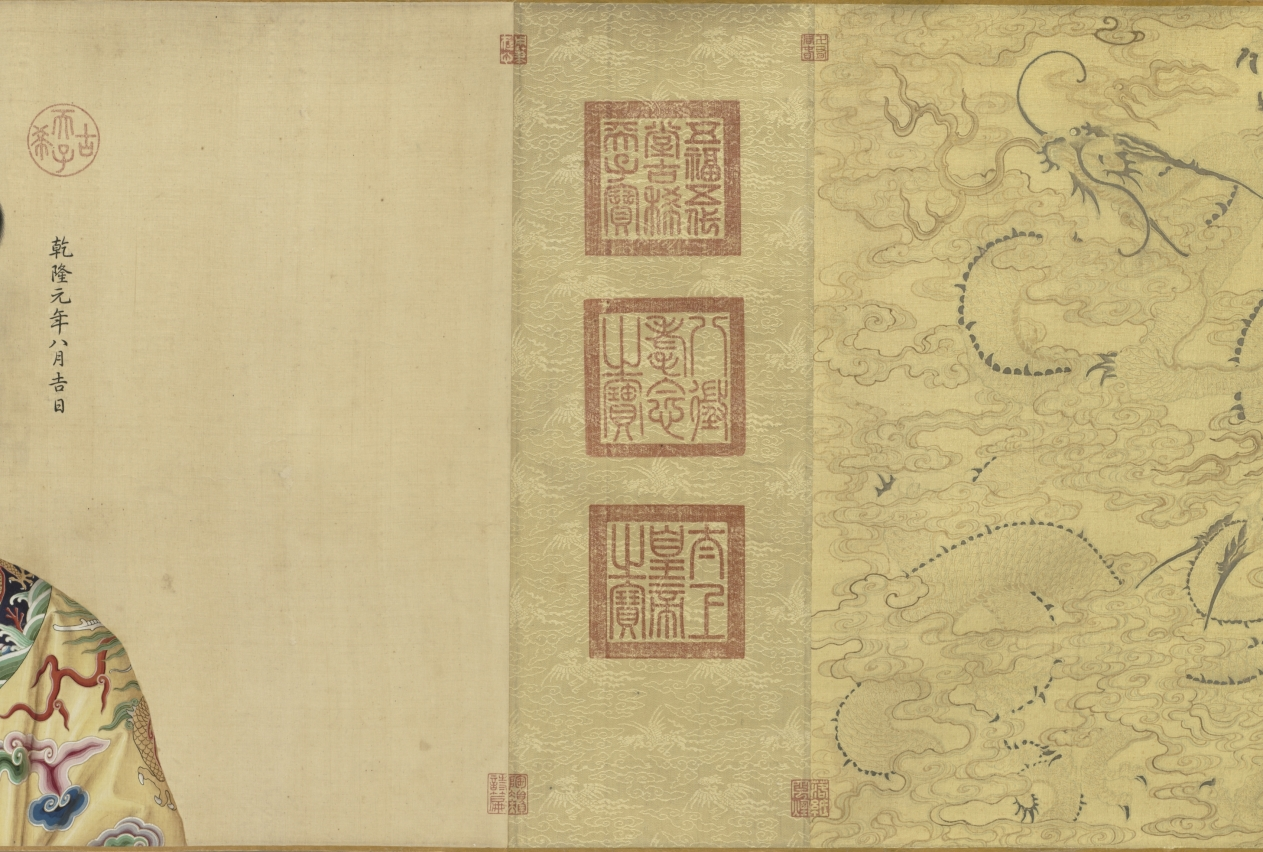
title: Portraits of the Qianlong Emperor and His Twelve Consorts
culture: China, Qing dynasty (1644–1911), Qianlong reign (1736–95)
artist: Giuseppe Castiglione (Italian, 1688–1766)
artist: and others (Chinese)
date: 1736–70s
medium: Handscroll; ink and color on silk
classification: Painting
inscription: 9 seals of the Qianlong emperor (r. 1736–95).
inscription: The eighth month, first year of Qianlong [1736] 乾隆元年八月吉日. The Empress (Xiaoxian) 皇后 (1712–1748), The Guifei (Huixian) 貴妃 (?-–1745), Chunfei 純妃 (1713–1760), Jiafei 嘉妃 (?–1755), Lingfei 令妃 (1727–1775), Shufei 舒妃 (1728–1777), Qingbin 慶嬪 (1724–1774), Yingbin 穎嬪 (1731–1800), Xinbin 忻嬪 (?–1764), Dunfei 惇妃 (1746–1806), Xunfei 順妃 (1749–1788), Shunbin 循嬪 (?–1797).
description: This portrait shows the Qianlong emperor at 26, in the first year of his reign. His likeness is followed by portraits of the empress and eleven consorts. Their portraits document the appearances of the court women around the time when they received their respective imperial titles, which occurred at different stages of the emperor's life. The first three portraits were done by the Jesuit (Roman Catholic) missionary artist Giuseppe Castiglione, whereas the later ones were by Chinese court painters. Formal portraiture contributed to the affirmation of status and construction of role and identity. This scroll served as both familial documentation and a "mind picture" of the Qianlong emperor, suggesting that his constructed image of emperorship was inseparable from concepts of self and family. It was stored in a carved red lacquer box bearing the original painting title Mind Picture of a Well-Governed and Tranquil Reign (see CMA 1969.32).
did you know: Lingfei 令妃 (1727–1775), the first consort depicted in the maroon or “incense-colored" 香色 robe, was the mother of six of Qianlong’s children, including the future Emperor Jiaqing.